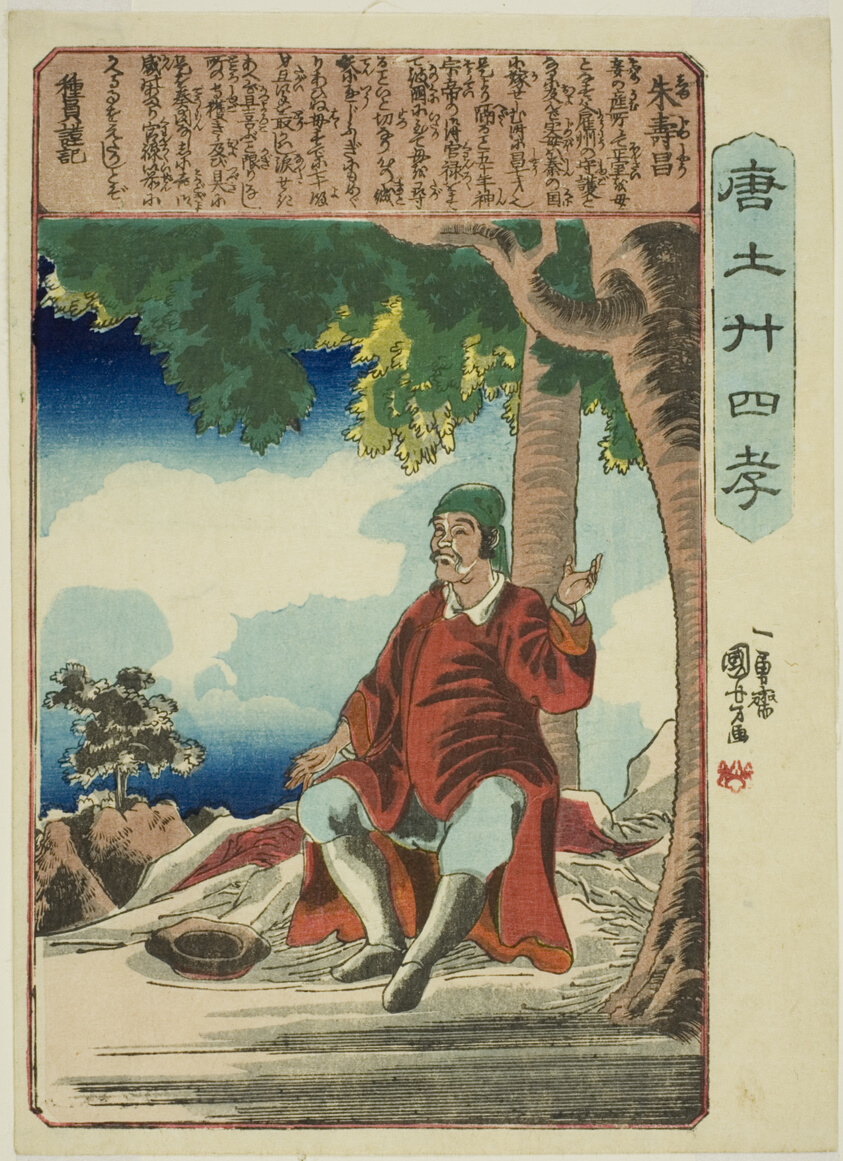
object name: Print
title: Zhu Shouchang (Shu Jusho), from the series "Twenty-four Paragons of Filial Piety in China (Morokoshi nijushiko)"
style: Japanese (culture or style)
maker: Utagawa Kuniyoshi (Japanese, 1797-1861)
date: c. 1848/50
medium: Color woodblock print; chuban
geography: Japan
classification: woodblock print; print; asian art